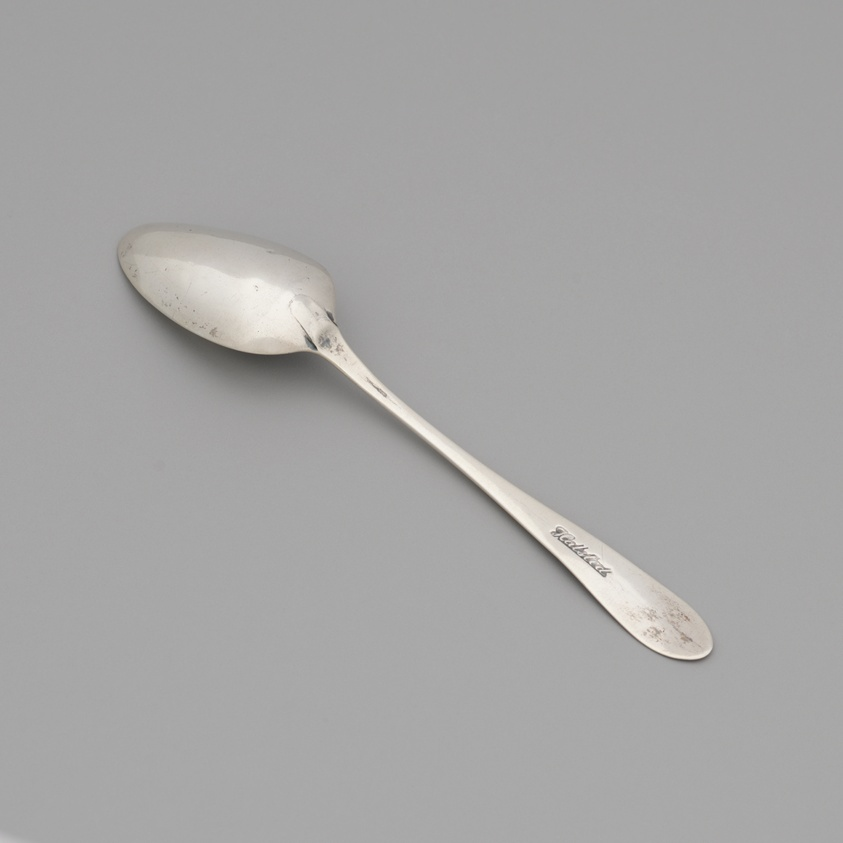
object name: Metalwork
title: Spoon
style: 18th Century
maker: Benjamin Halsted (American, 1734–1817); Probably Philadelphia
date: 1779–85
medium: Silver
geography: Philadelphia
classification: decorative arts; spoon